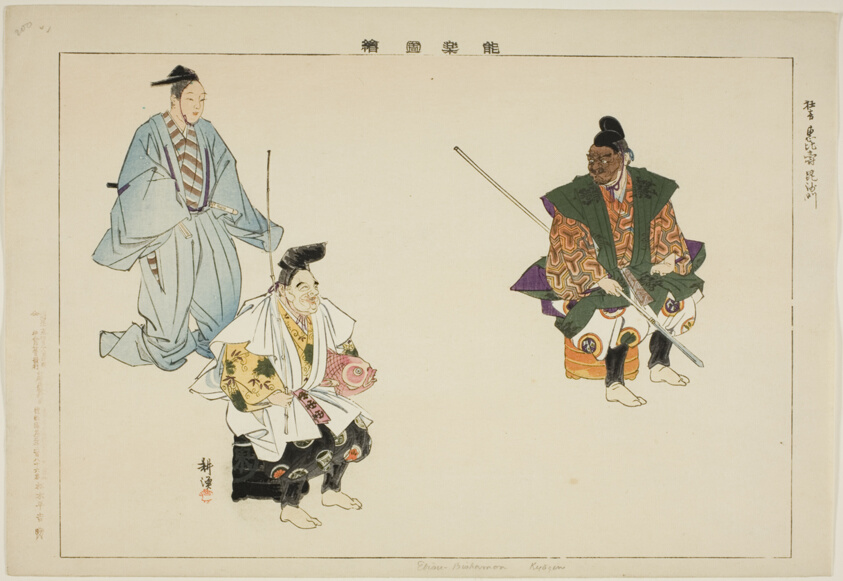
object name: Print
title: Ebisu- Bishamon (Kyogen), from the series "Pictures of No Performances (Nogaku Zue)"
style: Japanese (culture or style)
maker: Tsukioka Kogyo; Japanese, 1869-1927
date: 1898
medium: Color woodblock print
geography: Japan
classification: woodblock print; print; asian art